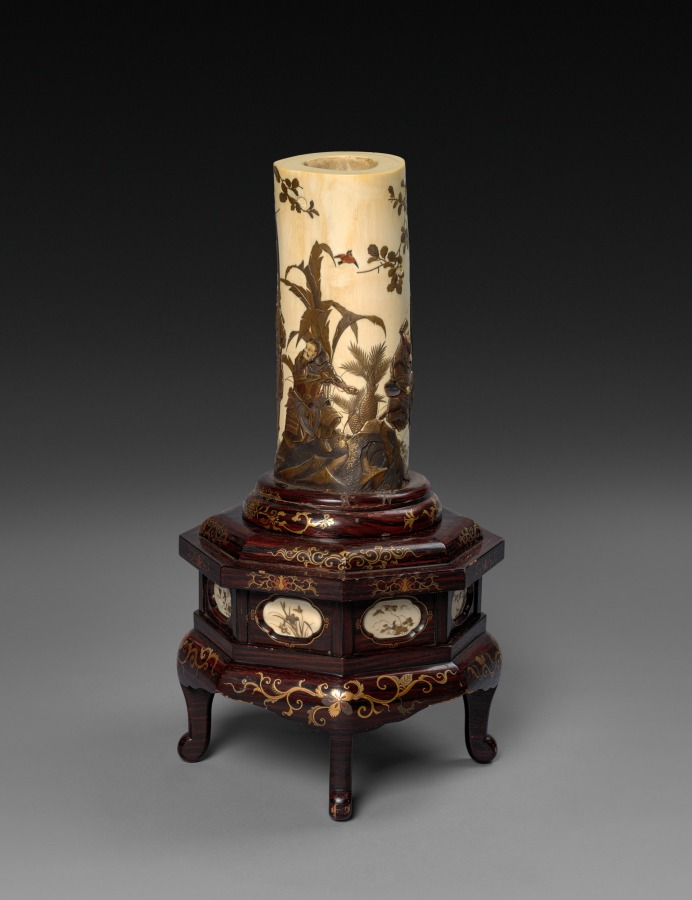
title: Ivory Tusk Vase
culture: Japan, Meiji period (1868–1912)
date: late 1800s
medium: carved ivory, pigment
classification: Ivory